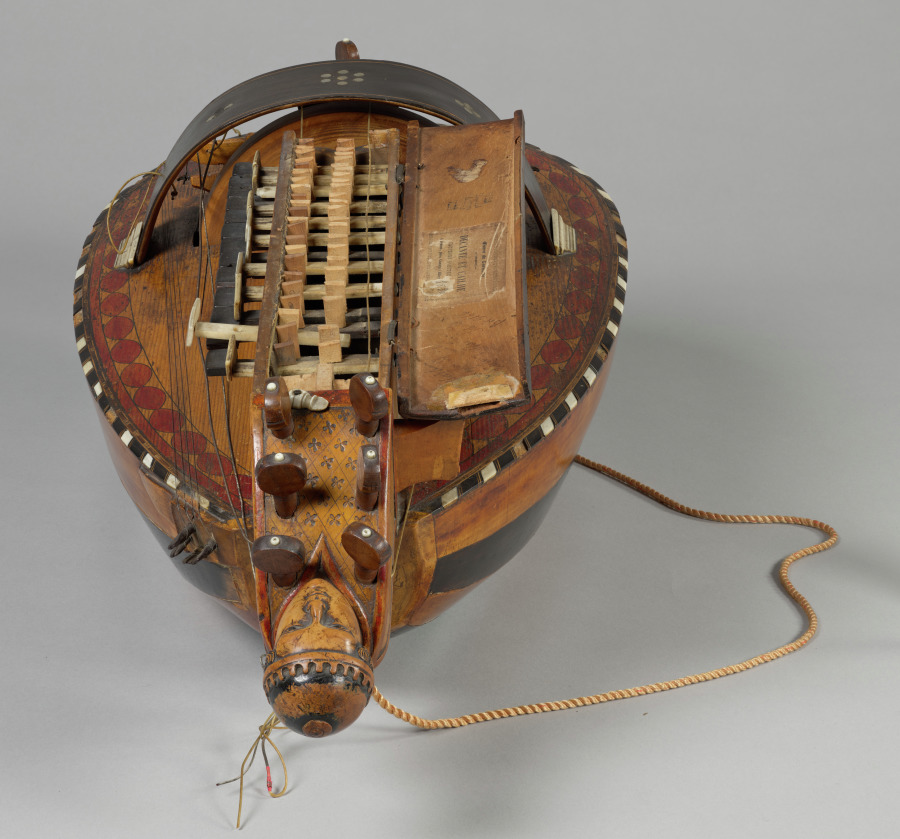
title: Vielle à Roue (Hurdy-Gurdy)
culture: France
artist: Jacques Decante (French, 1808–1884)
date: 1865–70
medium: Wood; mother-of-pearl inlay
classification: Musical Instrument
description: In France, the hurdy-gurdy is known as the vielle à roue (wheel fiddle). This six-stringed musical instrument produces sound by a hand crank-turned wheel that rubs against the strings. The wheel functions much like a violin bow, and single notes sound similar to those of a violin. Melodies are played on a keyboard that presses small wedges against the strings to change their pitch.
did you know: This vielle à roue was made in the French village of Jenzat, which was the manufacturing center for hurdy-gurdies during the 19th century.